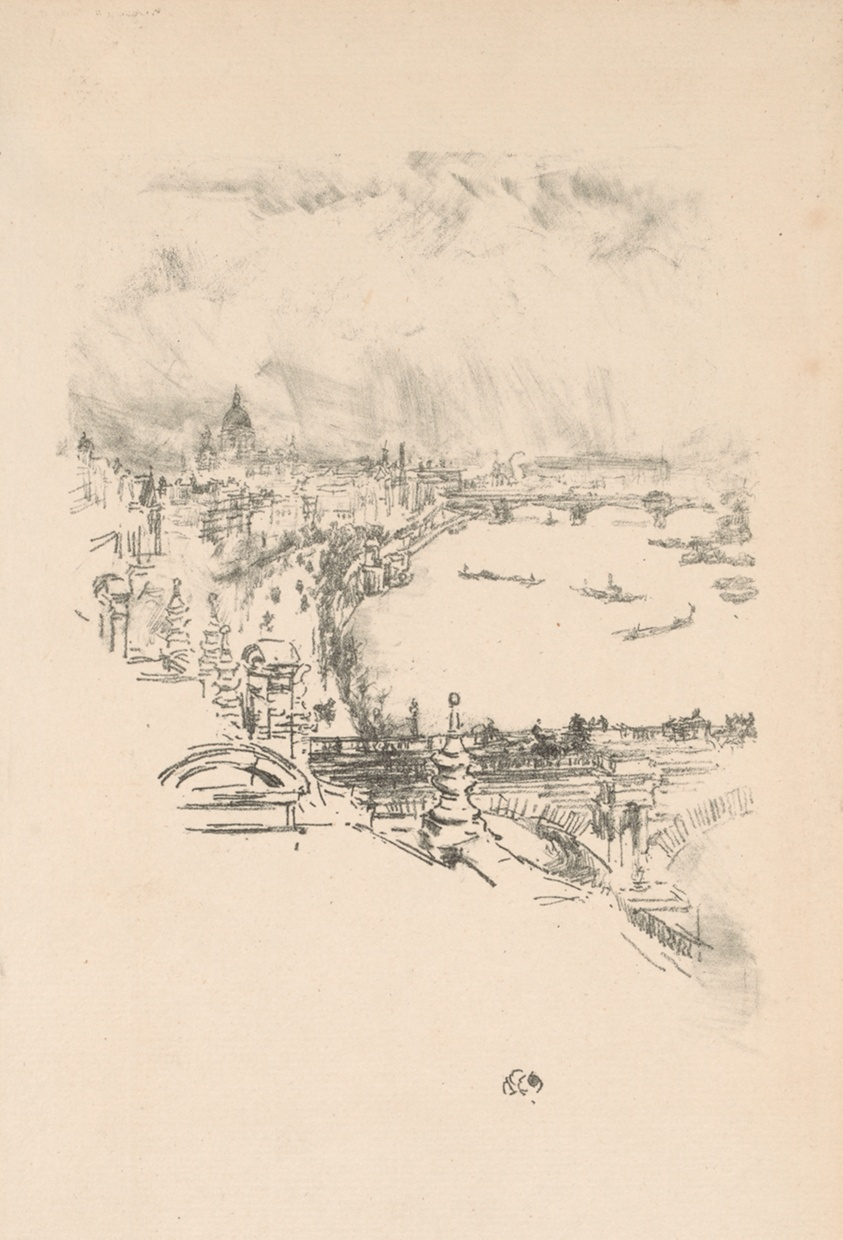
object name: Print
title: Little London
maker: James McNeill Whistler (American, 1834-1903)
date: 1896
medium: Transfer lithograph in black with stumping, on cream laid paper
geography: United States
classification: transfer lithograph; lithograph; print; prints and drawing; paper